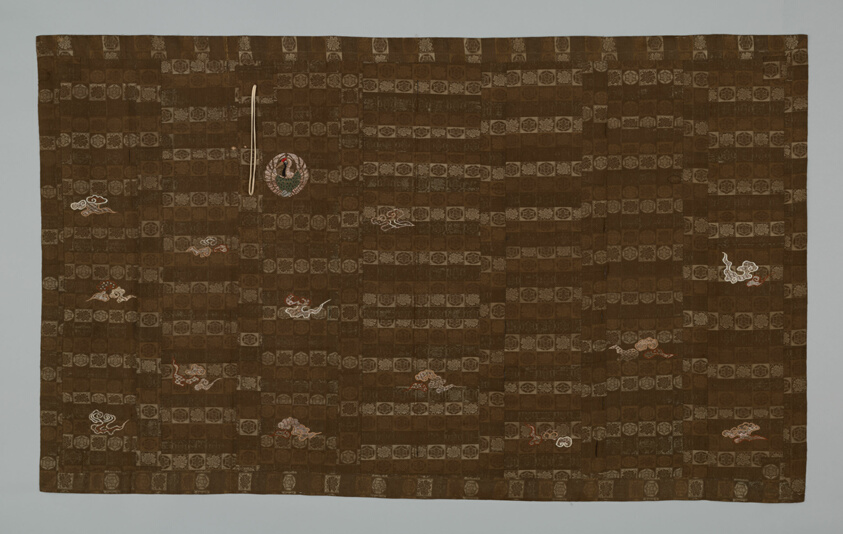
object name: Textile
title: Kesa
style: meiji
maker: Japan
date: Meiji period (1868–1912), 1870/90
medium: Silk, plain weave with plain interlacings of secondary binding warps and supplementary patterning wefts; embroidered with silk and gold-leaf-on-lacquered-paper strip in satin stitches; lining: silk, plain weave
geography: Japan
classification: textile; needlework (visual works); liturgical - buddhist; weaving